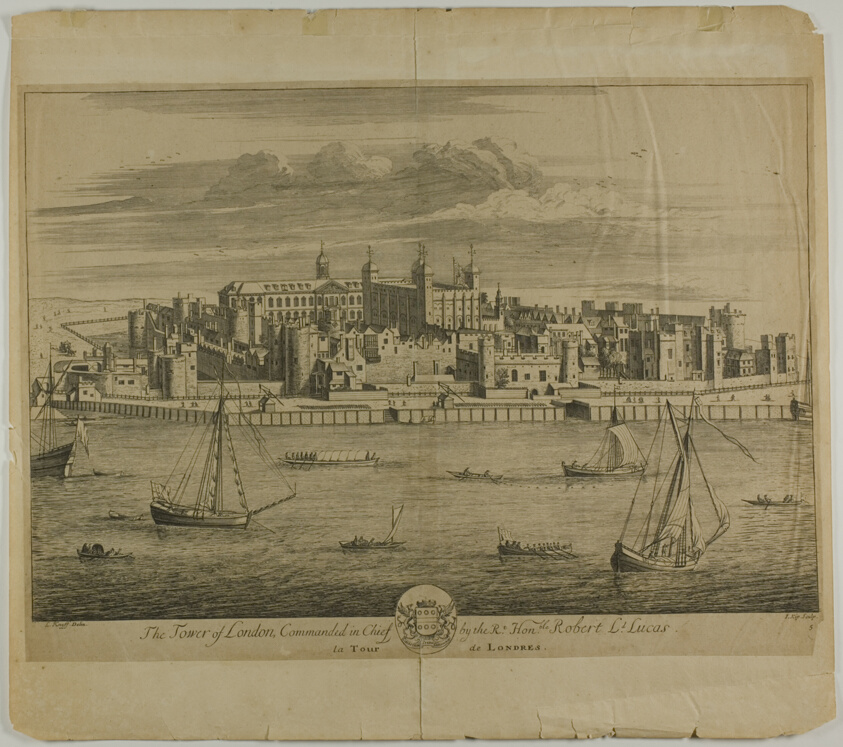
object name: Print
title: The Tower of London, plate five from Britannia Illustrata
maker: Jan Kip (Dutch, c. 1653-1722); after Leonard Knyff (Dutch, 1650-1721); published by David Mortier (French, 1673-1728)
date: published 1707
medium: Etching in black on buff laid paper, laid down on cream wove paper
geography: Netherlands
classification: prints and drawing; engraving; etching; print